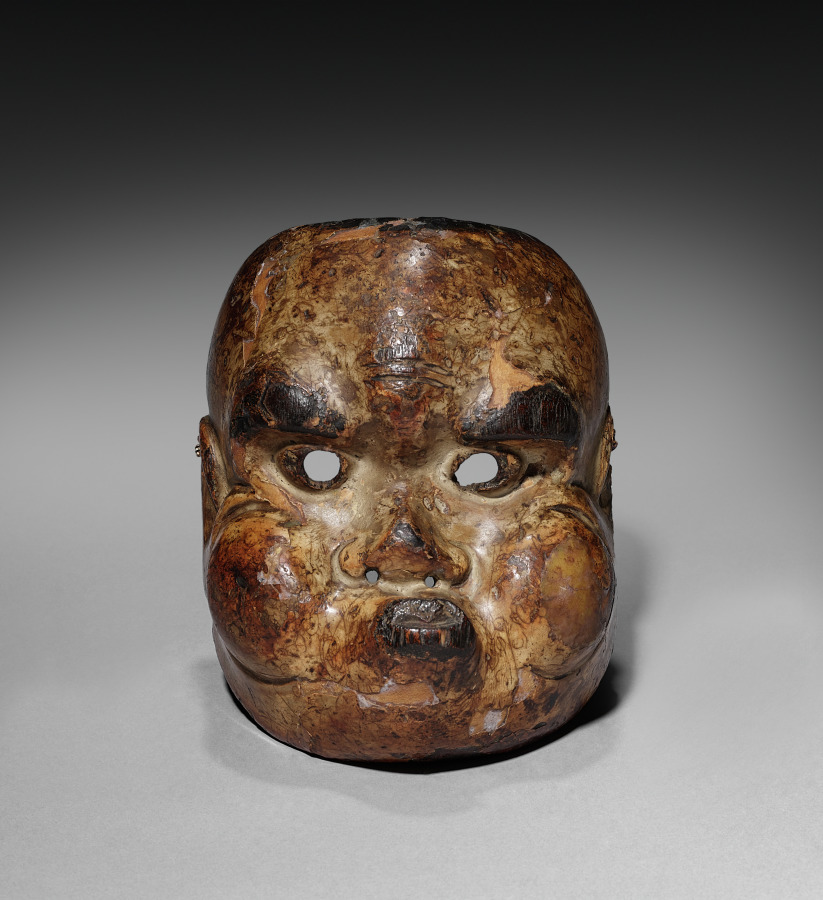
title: Kyogen Mask: Whistler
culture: Japan, Edo period (1615–1868)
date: 1600s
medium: wood with color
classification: Sculpture